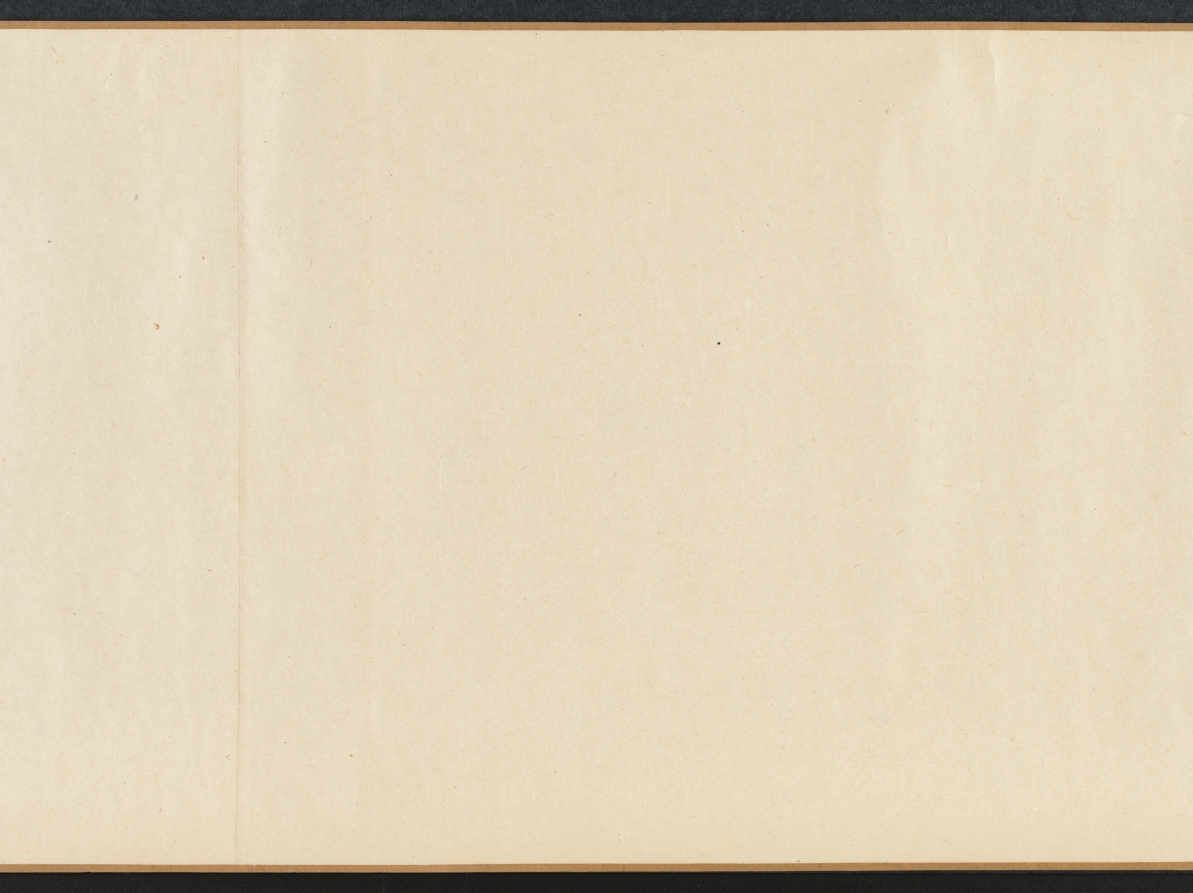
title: Landscape with Bamboo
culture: China, Yuan dynasty (1271-1368)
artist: Song Ke (Chinese, 1327–1387)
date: 1300s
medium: Handscroll; ink on paper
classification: Painting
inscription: 東吳宋克戲為仲幾畏友圖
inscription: 2 colophons and 14 additional seals: 1 seal of Yü Chung-chi (14th c.); 1 seal of Wu Ch'eng (1469 jinshi); 1 colophon and 2 seals of Wu K'uan (1435–1504); 1 colophon and 9 seals of Cheng Qi (1911–1988); 1 seal unidentified.